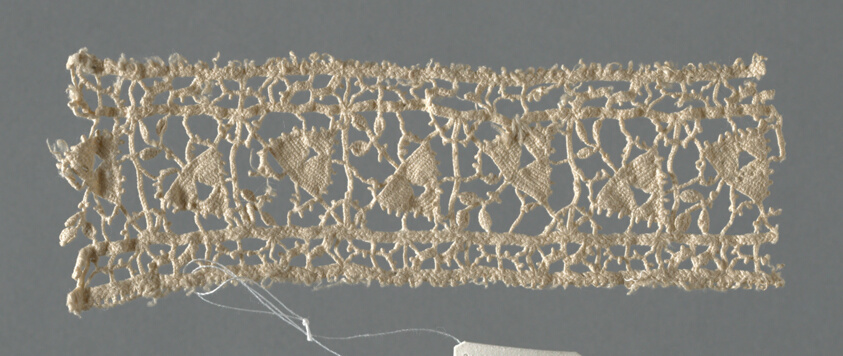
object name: Textile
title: Fragment (Border)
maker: Italy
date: 1601/25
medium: Linen, needle lace worked on a laid and plaited thread grid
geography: Italy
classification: textile; lace - needle